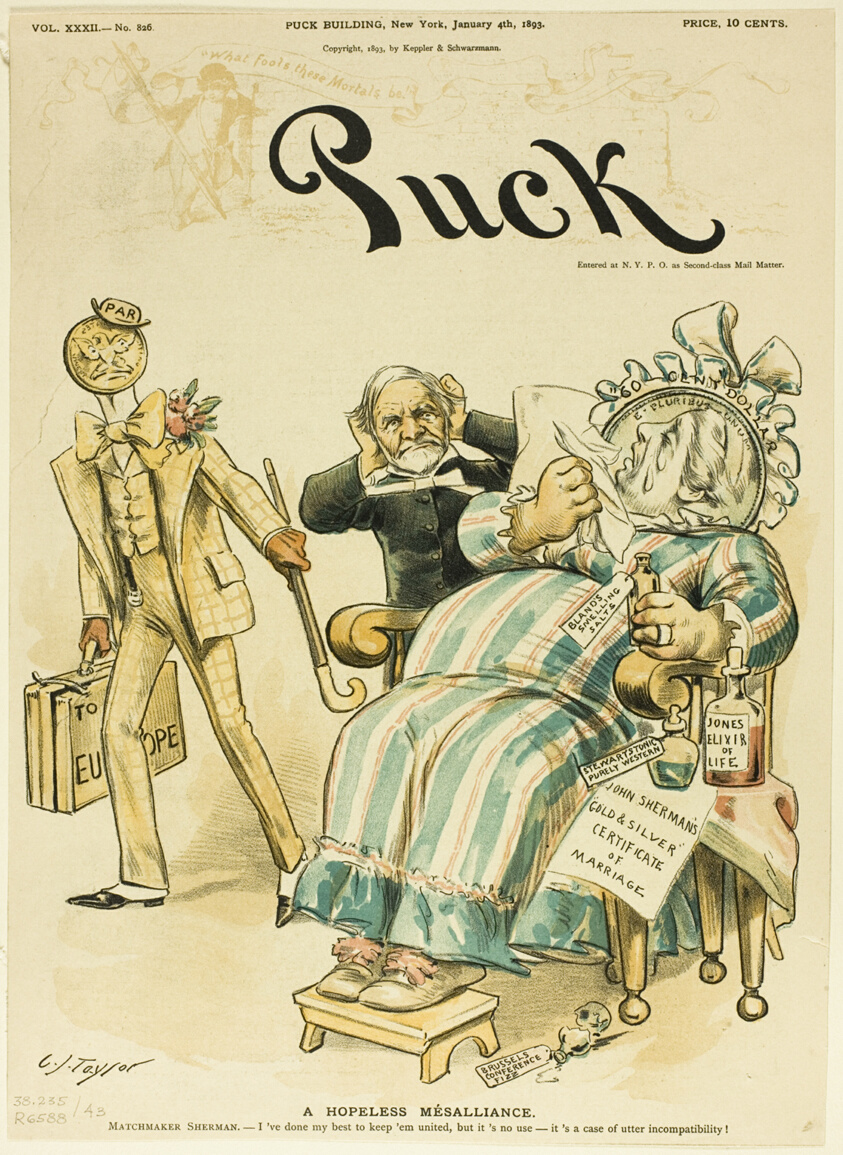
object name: Print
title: A Hopeless Mésalliance, from Puck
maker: C. Jay Taylor (American, 1855-1929)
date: published January 4, 1893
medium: Color lithograph on newsprint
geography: United States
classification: lithograph; print; prints and drawing